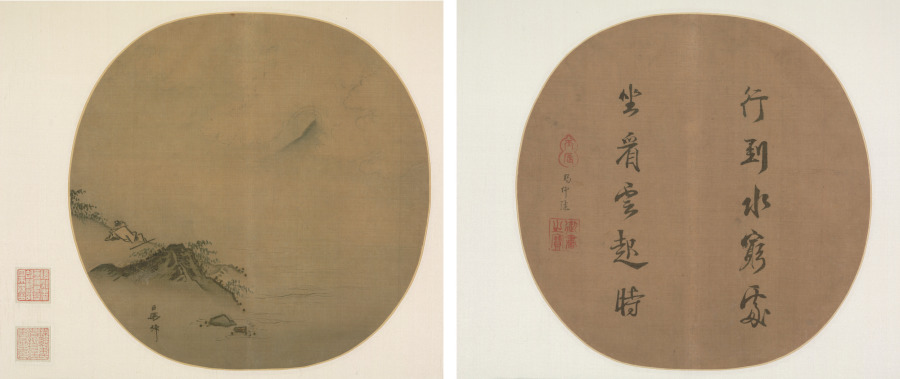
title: Scholar Reclining and Watching Rising Clouds; Poem by Wang Wei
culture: China, Southern Song dynasty (1127-1279)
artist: Ma Lin (Chinese, c. 1185–after 1260)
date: c. 1256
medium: Album leaf; ink on silk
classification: Painting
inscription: Inscription for 1961.421.1: Artist's signature: 臣馬麟 Your servant, Ma Lin. 2 seals on mounting of Chu Sheng-chai (20th c.).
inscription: Inscription for 1961.421.2: The 2 lines of poetry from right to left read: "I walk unto where waters end/ And sit down to watch when clouds arise."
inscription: Seals and Inscription for 1961.421.2: The top gourd-shaped seal has the cyclical date "bingchen" (丙辰 1256); the lower square seal is the Seal for Imperial Calligraphy. The inscription between the two imperial seals reads, "Presented to Chung-kuei".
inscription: Seals and Inscription on facing leaf for 1961.421.2: Inscription by Zhang Daqian (1899–1983). 1 seal of Chu Sheng-chai (20th Century) remounted onto the facing leaf to the left of the square calligraphy.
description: Poem and painting, once mounted together as one fan, exemplify the collaboration between imperial patron and court painter. Emperor Lizong’s calligraphy cites a verse from Wang Wei’s (701–761) poem, Walking to where the water ends, I sit and watch when clouds arise. Ma Lin’s response is this painting. At the water’s edge, a scholar reclines by a large rock. The view leads across the empty middle ground to a distant mountain. With sparse ink and subtly graded washes, Ma Lin visualizes the poetic verse. The painting suggests the impact of Chan aesthetics through interaction between the palace, literati-officials, and monasteries around Hangzhou.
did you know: Ma Lin was the son of Ma Yuan, the artist renowned for his unique composition and often referred to as "One-corner Ma."